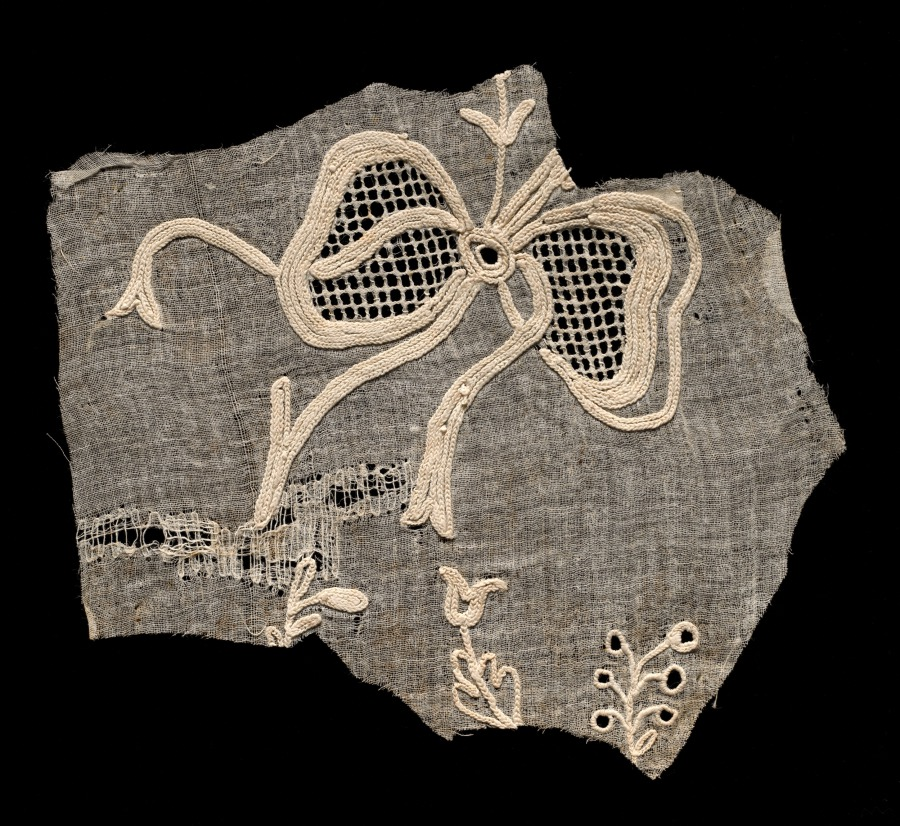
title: Lace Fragment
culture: Spain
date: 1700s–1800s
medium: Plain weave cotton: lace (drawnwork) with chain stitch (tambour work) embroidery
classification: Embroidery